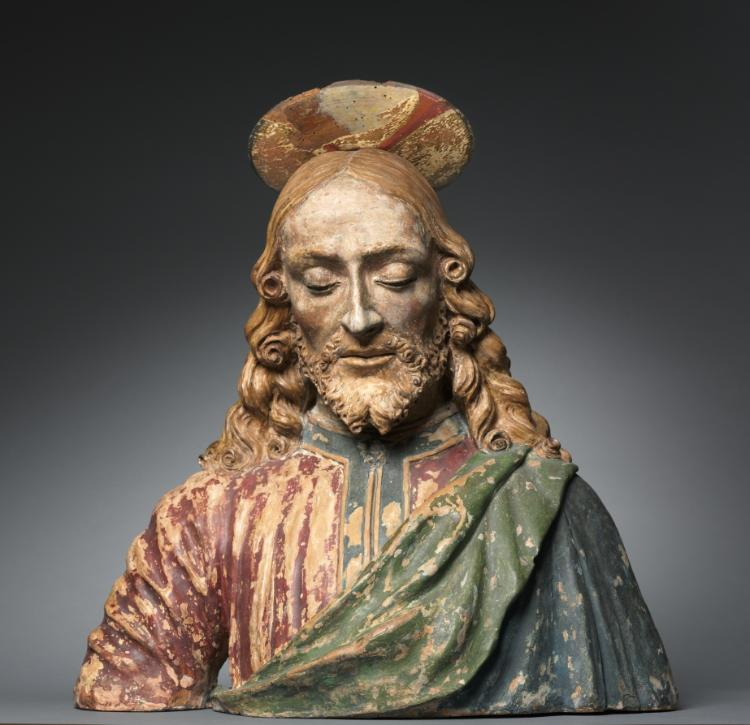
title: Bust of Christ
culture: Italy, Florence, 15th century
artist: workshop of Andrea del Verrocchio (Italian, 1435–1488)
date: c. 1470–1500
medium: painted terracotta and wood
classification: Sculpture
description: In the late 1400s Andrea del Verrochio set up a large workshop where he and his assistants reproduced copies of his sculpture and other works for a middle-class market. Originality was not the objective; in fact, most people were only interested in purchasing replicas of well-known works. This sculpture was modeled after Verrocchio's Christ figure in the bronze sculpture group Christ and St. Thomas at Orsanmichele in Florence, Italy. The medium of terracotta, which was cheaper than bronze or marble, made it possible to offer copies at a reasonable price. Additionally, workshop practices reduced the cost of the work by reducing labor time. Assistants were usually responsible for the shaping of the torso and garments, while Verrocchio was often in charge of executing the facial features and hair. In this sculpture the torso is out of proportion, and the general discrepancy in quality between the parts of the sculpture is due to the fact that it is a workshop production. Given that the facial features are so well executed and the statue retains a stirring motional quality, a trademark of Verrocchio's style which artists found hard to duplicate, it is probable that this sculpture was made in Verrocchio's studio, possibly even with active involvement by the artist on the head.